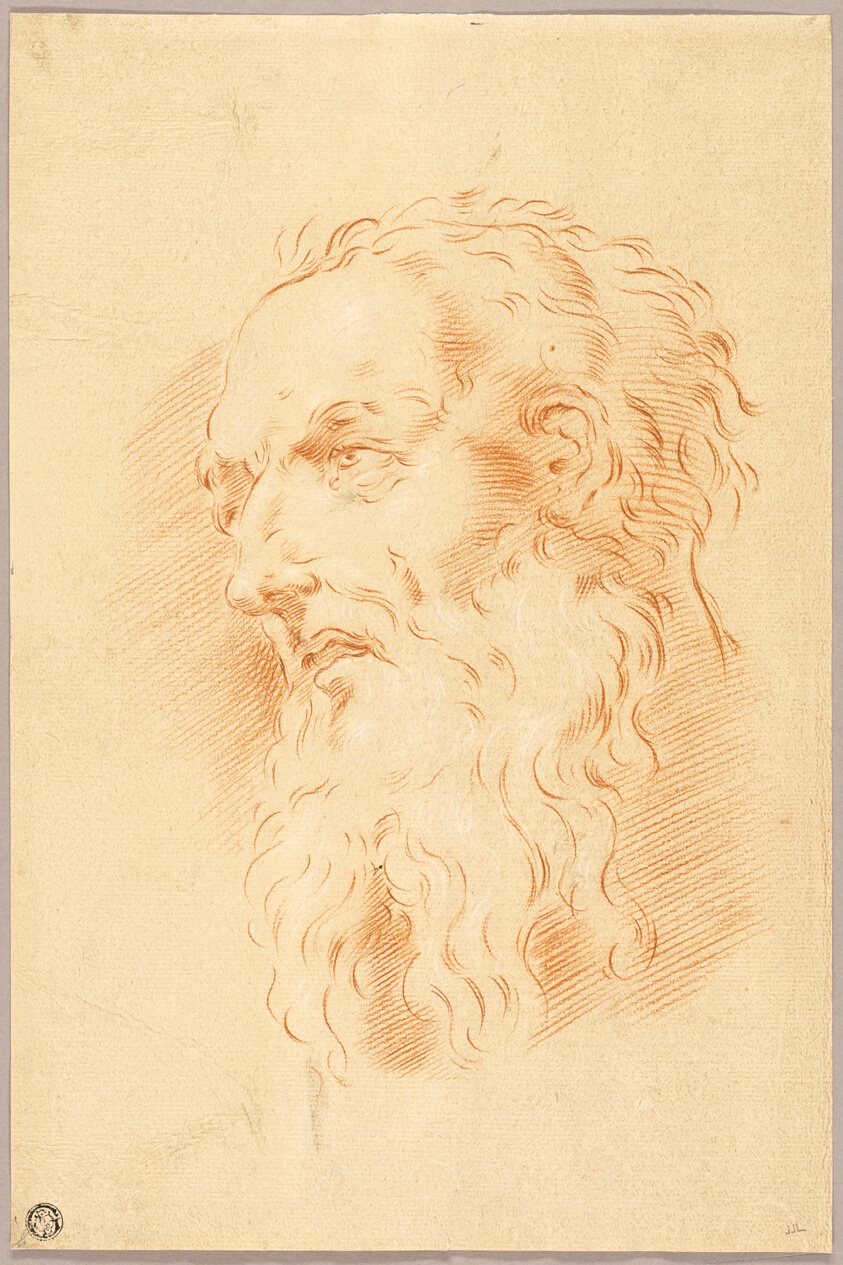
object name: Drawing and Watercolor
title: Head of Bearded Man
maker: Style of Pietro Antonio Novelli (Italian, 1729-1804); or after Donato Creti (Italian, 1671-1749); or Carlo Maratti (talian, 1625-1713)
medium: Red chalk heightened with white chalk, on cream laid paper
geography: Italy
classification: chalk; drawings (visual works); prints and drawing